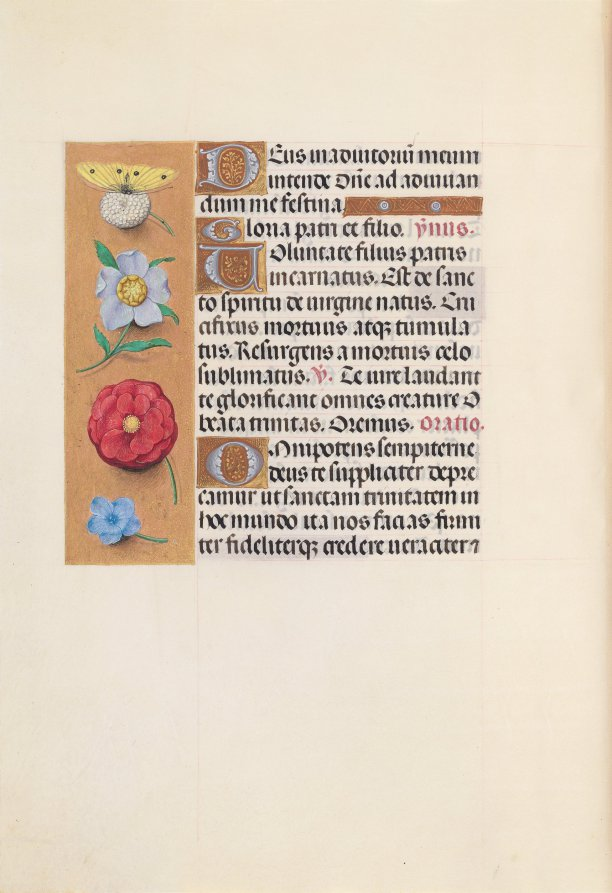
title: Hours of Queen Isabella the Catholic, Queen of Spain: Fol. 21v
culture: Flanders, Ghent and Bruges, late 15th century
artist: Master of the First Prayerbook of Maximillian (Flemish, c. 1444–1519)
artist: and Associates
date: c. 1500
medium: ink, tempera, and gold on vellum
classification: Bound Volume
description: This manuscript was illuminated by a circle of at least five highly organized manuscript painters active in the Flemish cities of Ghent and Bruges. The principal illuminator was Alexander Bening, who painted the majority of the book's miniatures. Manuscripts produced by this circle of artists are renowned for the decoration of their borders, which typically feature a rich variety of realistically-painted flowers, birds, and butterflies. This prayer book, called a book of hours, was intended not for a cleric, but for the private devotions of a lay person-in this case, Isabella the Catholic, Queen of Spain (1451-1504). Isabella's coat of arms embellishes the book's frontispiece. It is unlikely that the book was commissioned by the Queen herself; rather, she probably received it as a diplomatic gift from someone courting her patronage, perhaps Cardinal Francisco Jimenez de Cisneros. A Franciscan friar, Jimenez was dependent upon Isabella for his advancement, first to the post of Queen's confessor in 1492, and then to Archbishop of Toledo in 1495.